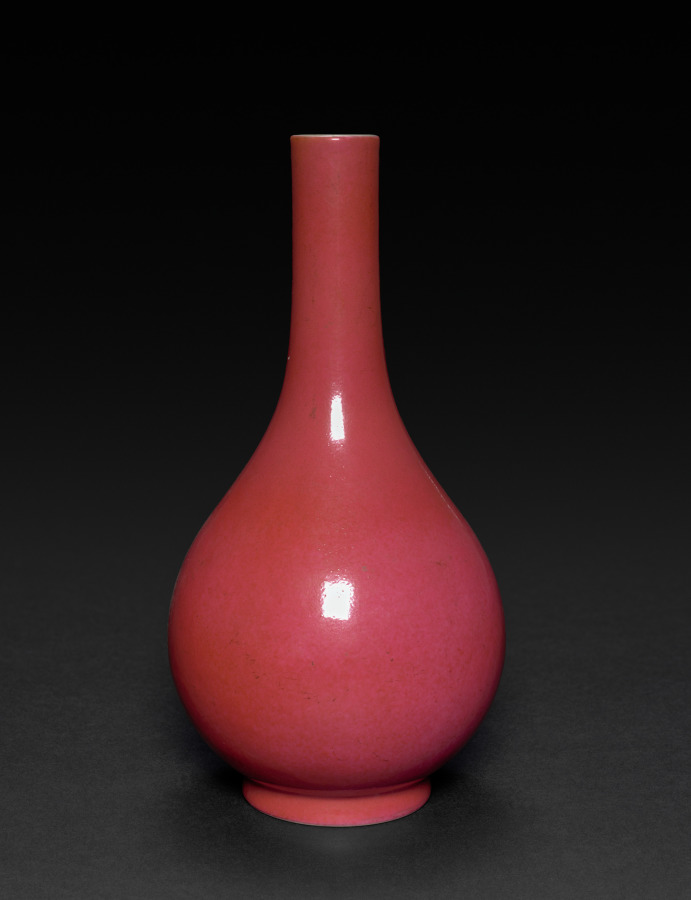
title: Vase with Pear-Shaped Body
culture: China, Qing dynasty (1644-1911)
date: 1644–1911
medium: porcelain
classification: Ceramic